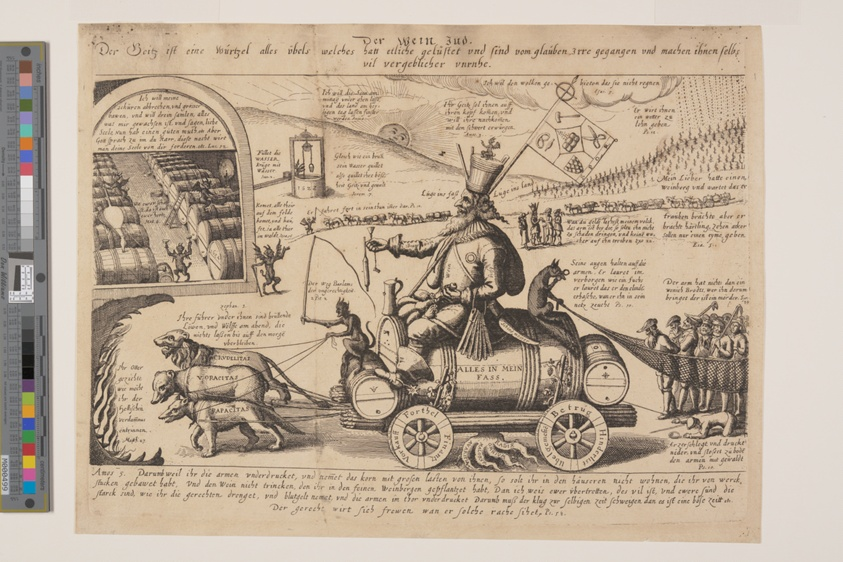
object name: Print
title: Der Wein Jud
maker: Jan van der Heyden (Dutch, 1637–1712)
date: 1628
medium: Etching on ivory laid paper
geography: Netherlands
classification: print; paper; prints and drawing; etching